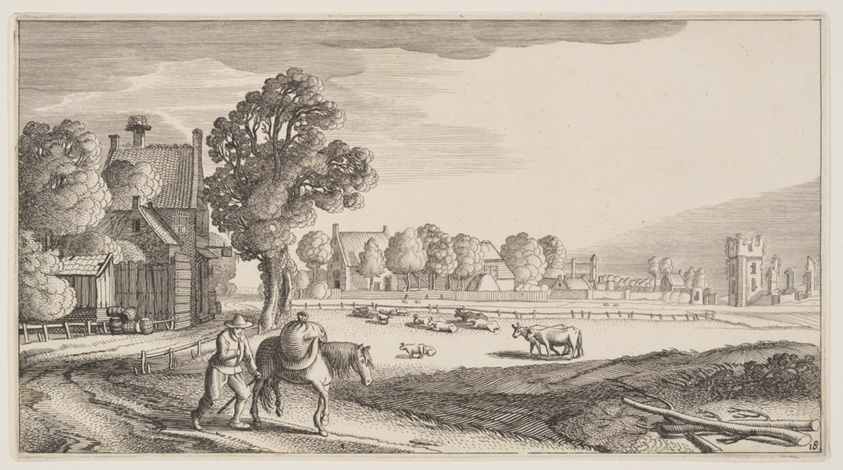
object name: Print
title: Roads along a Pasture, from Landscapes (Playsante Lantschappen)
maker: Attributed to Claes Jansz. Visscher II (Dutch, 1586-1652); after Jan van de Velde II (Dutch, c. 1593-1641)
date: c. 1641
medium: Etching, with engraving, on ivory laid paper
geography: Netherlands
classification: etching; paper; print; prints and drawing